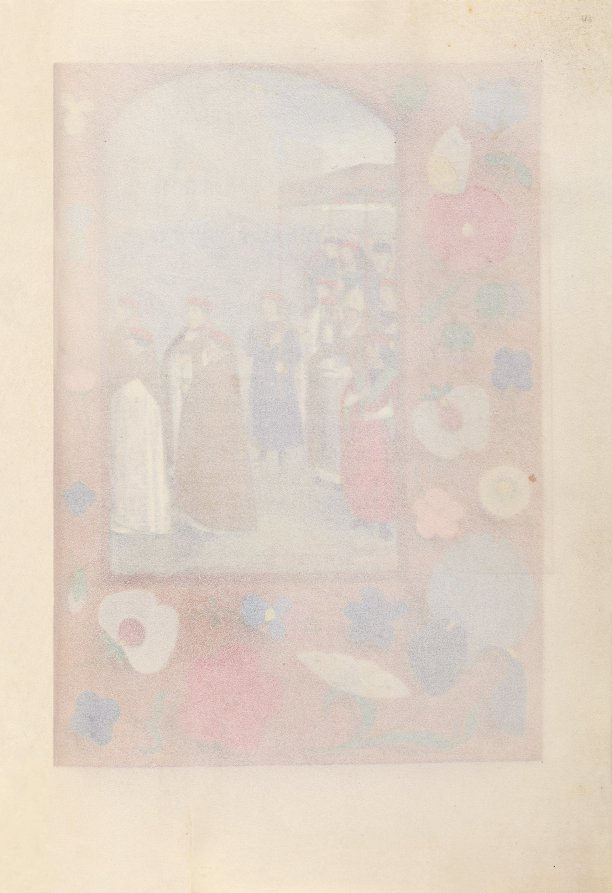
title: Hours of Queen Isabella the Catholic, Queen of Spain: Fol. 43r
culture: Flanders, Ghent and Bruges, late 15th century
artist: Master of the First Prayerbook of Maximillian (Flemish, c. 1444–1519)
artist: and Associates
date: c. 1500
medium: ink, tempera, and gold on vellum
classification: Bound Volume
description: This manuscript was illuminated by a circle of at least five highly organized manuscript painters active in the Flemish cities of Ghent and Bruges. The principal illuminator was Alexander Bening, who painted the majority of the book's miniatures. Manuscripts produced by this circle of artists are renowned for the decoration of their borders, which typically feature a rich variety of realistically-painted flowers, birds, and butterflies. This prayer book, called a book of hours, was intended not for a cleric, but for the private devotions of a lay person-in this case, Isabella the Catholic, Queen of Spain (1451-1504). Isabella's coat of arms embellishes the book's frontispiece. It is unlikely that the book was commissioned by the Queen herself; rather, she probably received it as a diplomatic gift from someone courting her patronage, perhaps Cardinal Francisco Jimenez de Cisneros. A Franciscan friar, Jimenez was dependent upon Isabella for his advancement, first to the post of Queen's confessor in 1492, and then to Archbishop of Toledo in 1495.